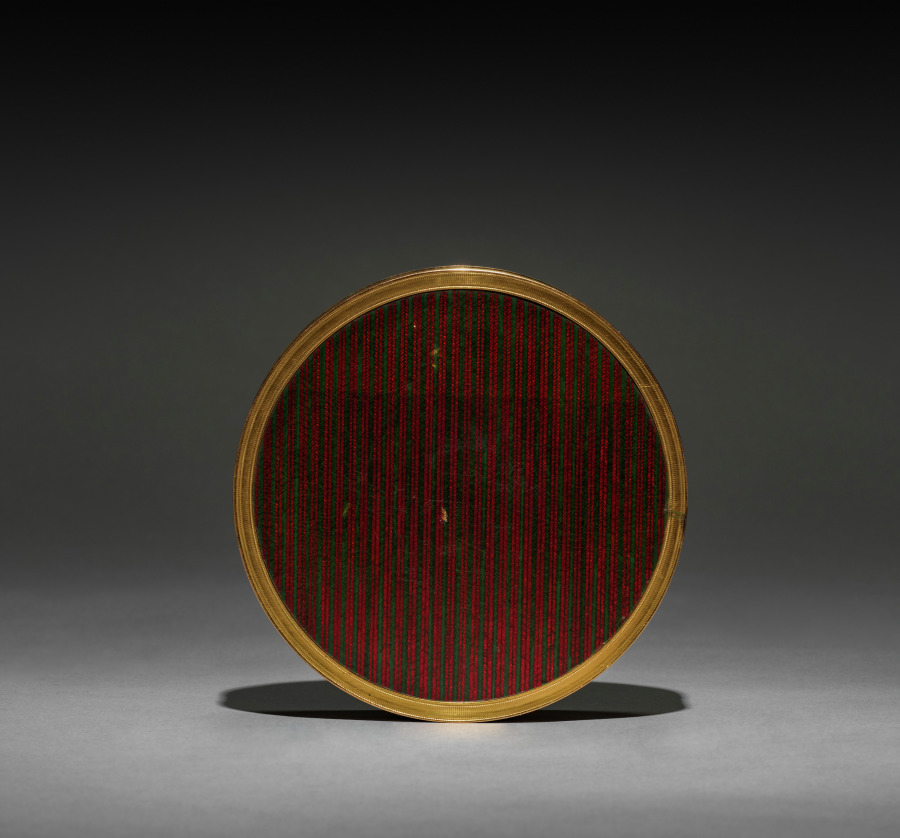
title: Snuff Box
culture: France, 18th century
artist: after François Boucher (French, 1703–1770)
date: 1780–1800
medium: gold or gilt metal mounts; sides and bottom enamel over gilt engine turned design; interior lined in tortoiseshell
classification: Miscellaneous